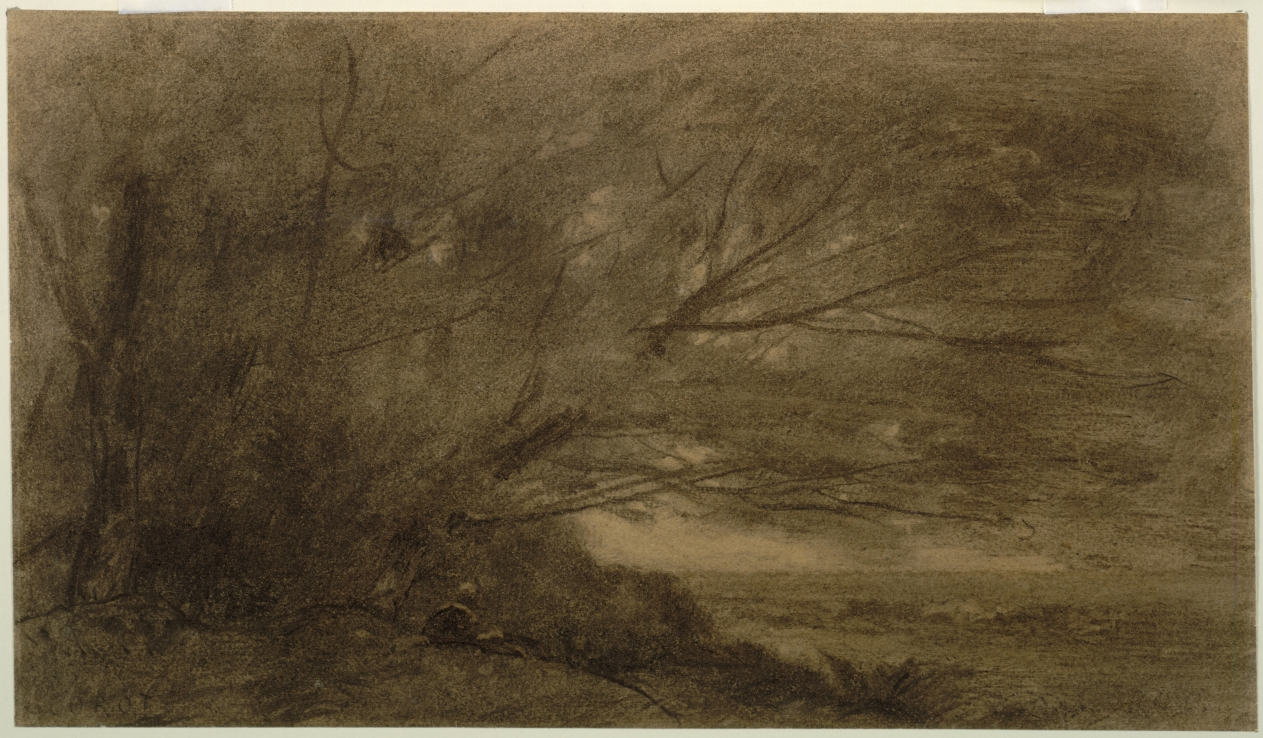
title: Landscape (The Large Tree)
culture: France, 19th century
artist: Jean Baptiste Camille Corot (French, 1796–1875)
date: c. 1865–70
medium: charcoal with stumping, erasing, and wet brushwork on light brown wove paper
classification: Drawing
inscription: inscribed, lower left, in charcoal: COROT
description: Jean-Baptiste-Camille Corot used sticks of charcoal, a powdery black medium, to dramatic effect in this late-career landscape, layering them and turning them on their side to form tonal areas and fine lines. Describing the period when the drawing was made, a colleague wrote that “one never saw [Corot] without . . . charcoal in his hand.” Such artworks conveyed the poetry the artist saw in nature and advanced his lifelong ambition of elevating landscape from the lowly status it held at the conservative French Academy. Here, he aimed to capture an evocative mood rather than a specific place, describing such works as “souvenirs,” or remembrances.